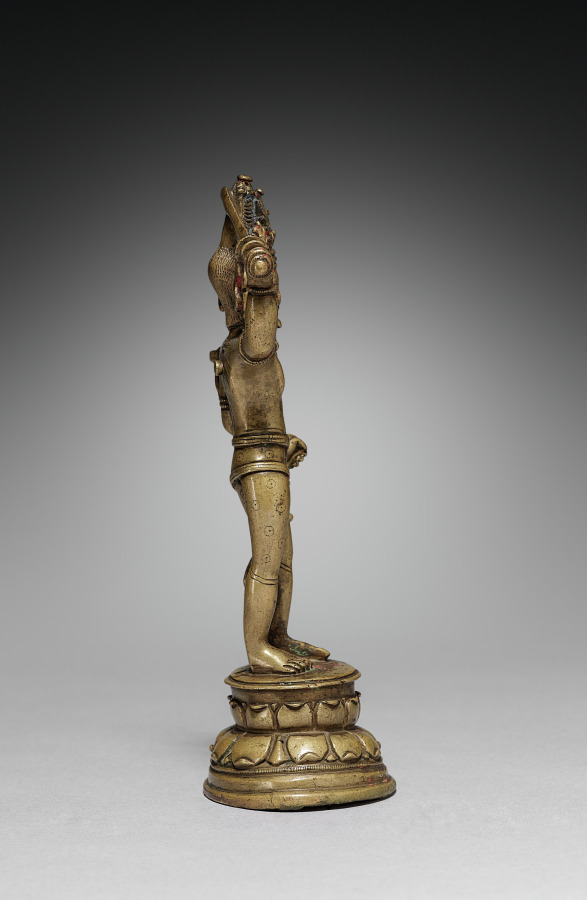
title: Standing Manjusri (Arapacana Form)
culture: India, Pala, 12th-13th century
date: 1100s-1200s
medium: bronze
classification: Sculpture